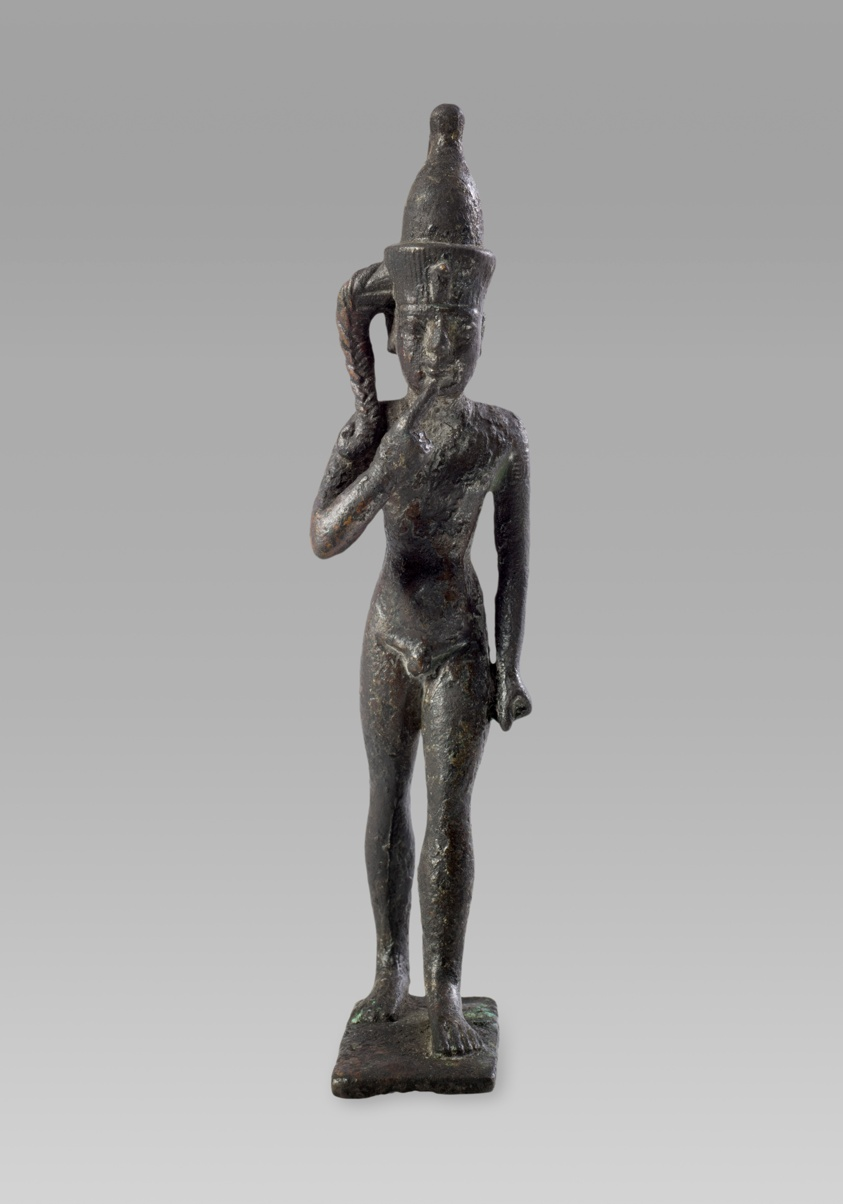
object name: Sculpture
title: Statuette of Horus the Child (Harpokrates)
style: late period (egyptian), ancient, egyptian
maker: Egyptian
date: Late Period (664-332 BCE)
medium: Copper alloy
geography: Egypt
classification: statuette; bronze; metal; sculpture; ancient art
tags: gods (deities), children